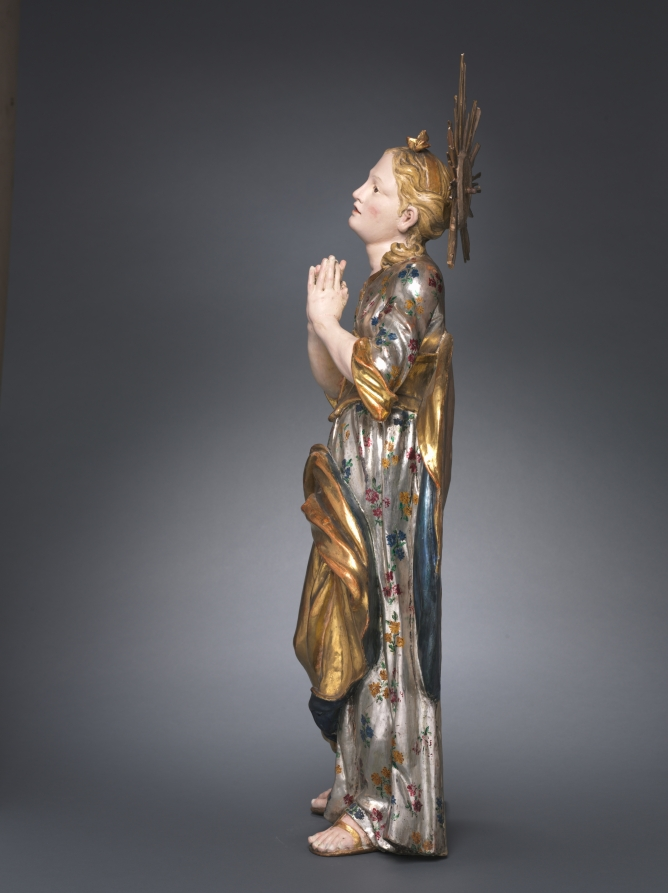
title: Virgin Mary as a Child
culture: Austria, Vienna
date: 1750–75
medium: painted and gilded wood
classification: Sculpture